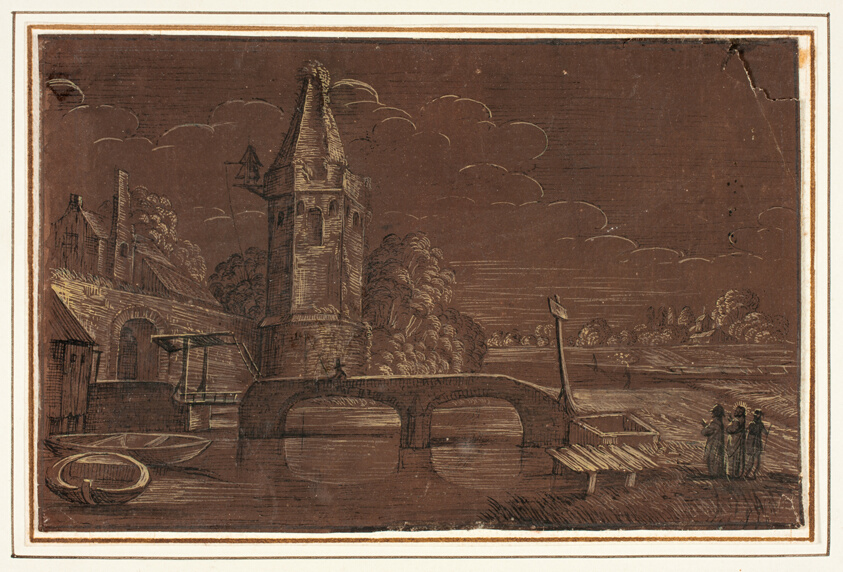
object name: Drawing and Watercolor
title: Christ on the Road to Emmaus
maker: Style of Jan van de Velde I; Dutch, c. 1568-1623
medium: Pen and brown ink, heightened with white gouache, on brown prepared ground, on tan wove paper, tipped onto card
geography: Netherlands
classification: pen and ink drawings; drawings (visual works); prints and drawing